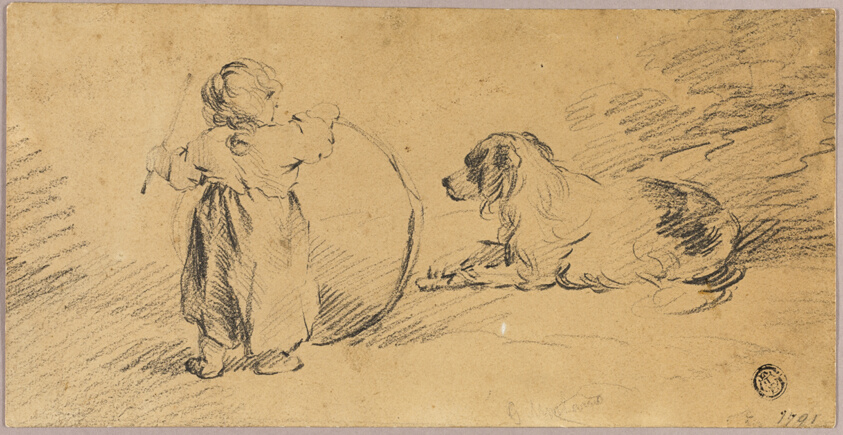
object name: Drawing and Watercolor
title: Child Playing with Ball and Dog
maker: George Morland (English, 1763-1804)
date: 1791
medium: Black crayon on brown wove paper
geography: England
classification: crayon; drawings (visual works); prints and drawing